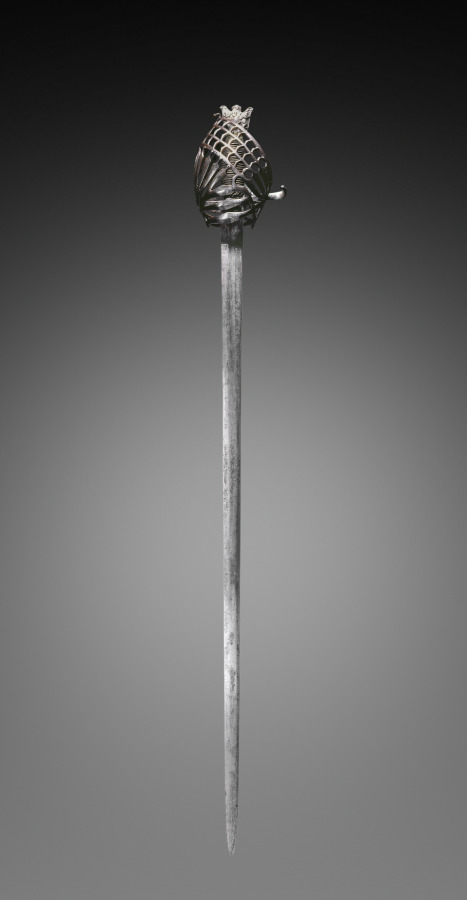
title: Schiavona Broadsword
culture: Italy, Venice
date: early 1700s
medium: steel and silver wire grip. silver pommel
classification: Arms and Armor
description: The schiavona-type broadsword features a complex barred guard that slopes forward. Its name derives from the Italian word for "Slavonic" and refers to the Slavonian corps who served as bodyguards to the Doge of Venice until the end of the Venetian Republic in 1797. Such swords were popular mainly with the Venetians.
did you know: A broadsword is a sword with a straight, wide, two-edged blade and was used by European heavy cavalry through the 1800s.